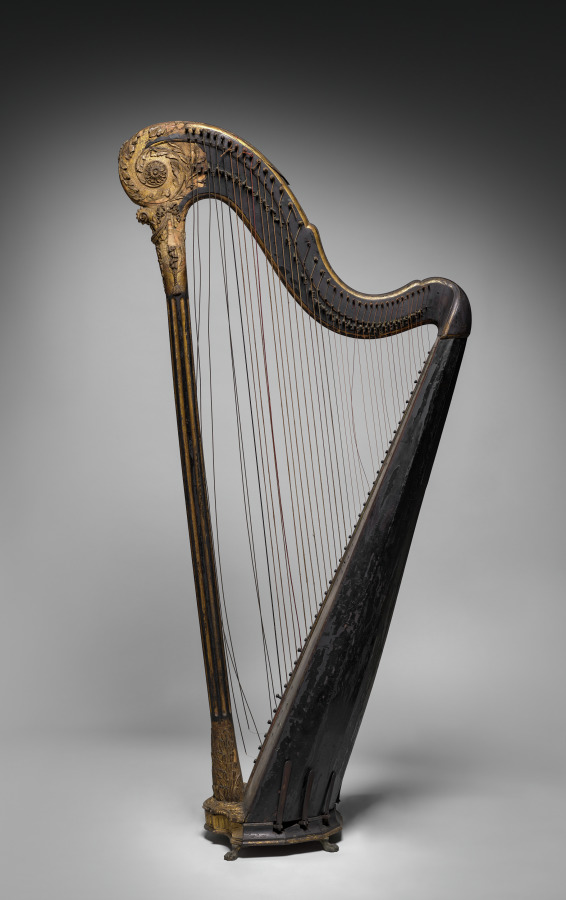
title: Harp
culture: France, 18th century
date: 1700s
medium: wood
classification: Musical Instrument